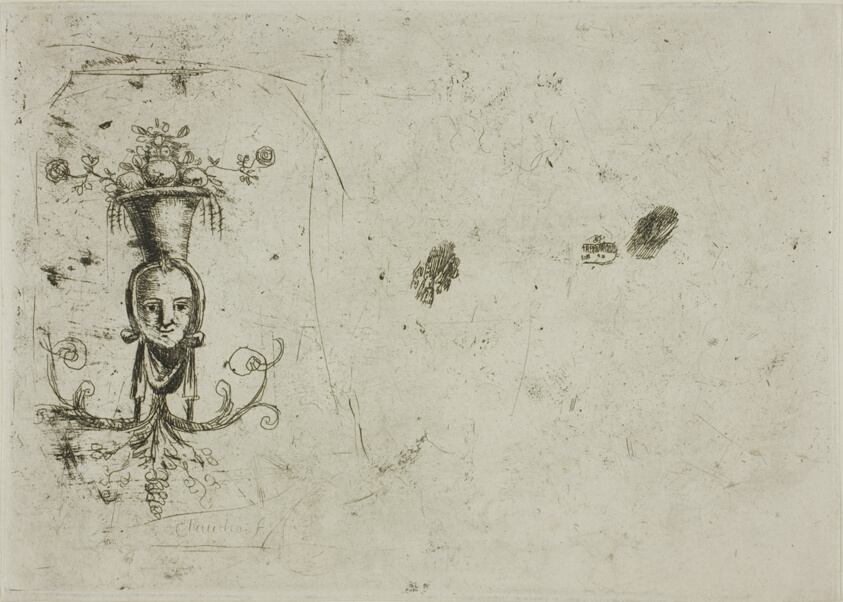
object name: Print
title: Arabesque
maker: Claude Lorrain (French, 1600-1682)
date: c. 1630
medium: Etching on ivory laid paper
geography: France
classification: etching; print; prints and drawing